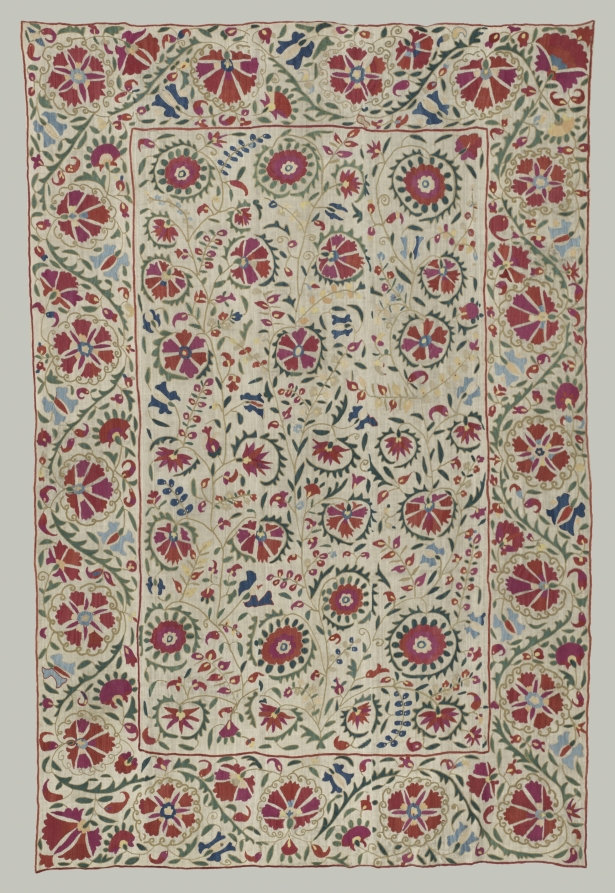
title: Suzani: Curtain or Bed Cover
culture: Uzbekistan, Bukhara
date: c. 1800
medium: Cotton: plain weave; silk: embroidery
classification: Embroidery